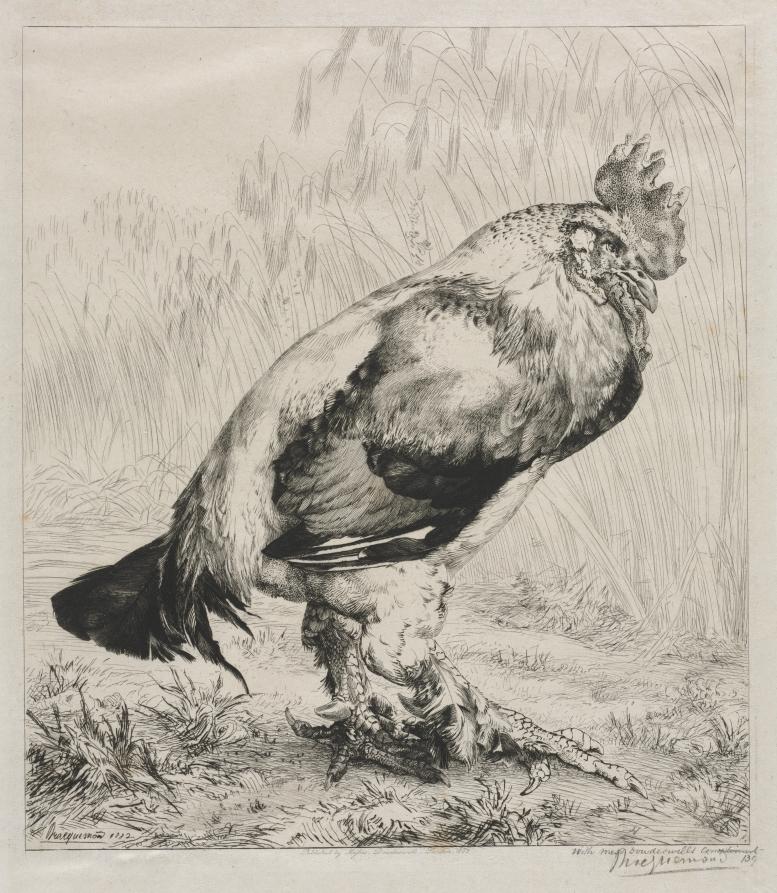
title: The Old Cock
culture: France, 19th century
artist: Félix Bracquemond (French, 1833–1914)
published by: Dowdeswell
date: 1882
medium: etching and drypoint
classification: Print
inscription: signed, lower right, in graphite: Bracquemond; inscribed, lower right, in pencil: with Mess. Dowdeswell's compliments signed and dated, lower left, in plate: Bracquemond 1882; lower center, in plate: Published by Mefsrs. Dowdeswell London 1882